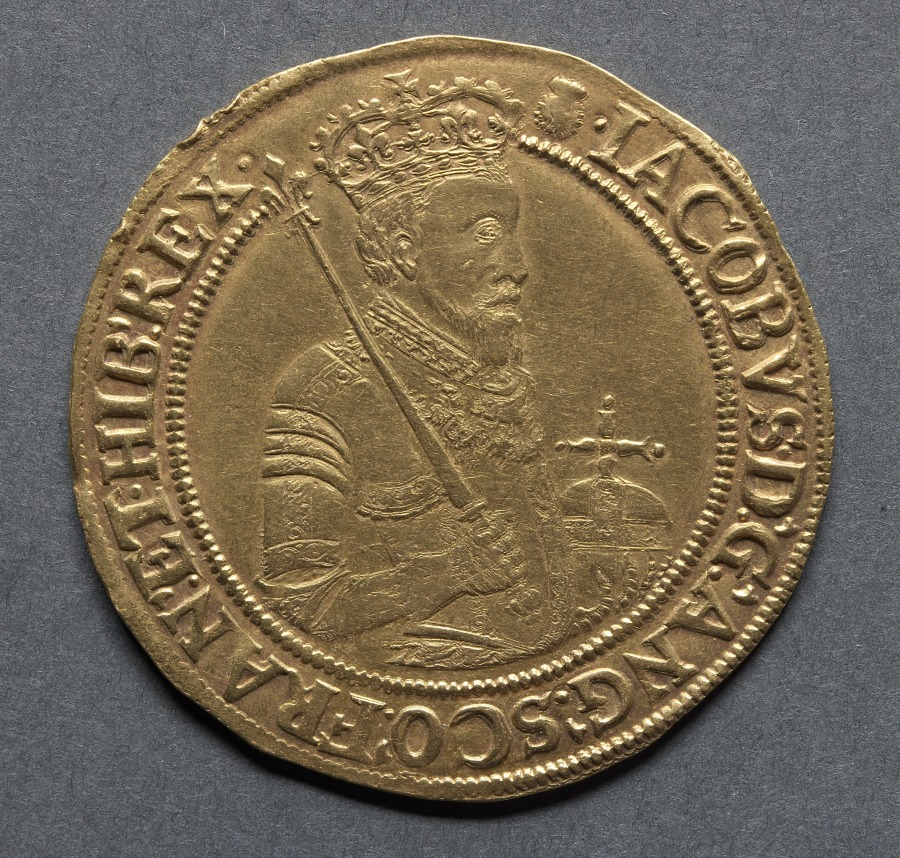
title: Sovereign: James I (obverse); Crowned Shield (reverse)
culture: England, James I, 1603-1625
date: 1603–4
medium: gold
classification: Coins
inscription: IACOBVS. D; G; ANG; SCO; FRAN; ET. HIB; REX.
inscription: EXVRGAT. DEVS. DISSIPENTVR. INIMICI.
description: The accession of James I to the throne of England brought about the union of the thrones of England and Scotland. This was duly recorded on the coinage, the royal arms on this rare piece now consisting of the arms of England (twice), Scotland, and Ireland. The English arms still contain the French lilies, though the last French possession, Calais, had been lost in the reign of Philip and Mary, 1544–58. On the reverse, SCO for Scotland was added to the royal title. The final unification of the two kingdoms did not take place until the 1706 Act of Union. James was in fact king of two separate countries and in Scotland, which had its own separate coinage till the act, where he is referred to as James VI. At first the coins were the same weight and fineness as those of Elizabeth I, but later a proclamation, due to "trade necessities," reduced the value by ten percent. In 1611, however, the value was restored.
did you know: The design of the reverse of this coin indicates it is from the beginning of the rule of James I in 1603.